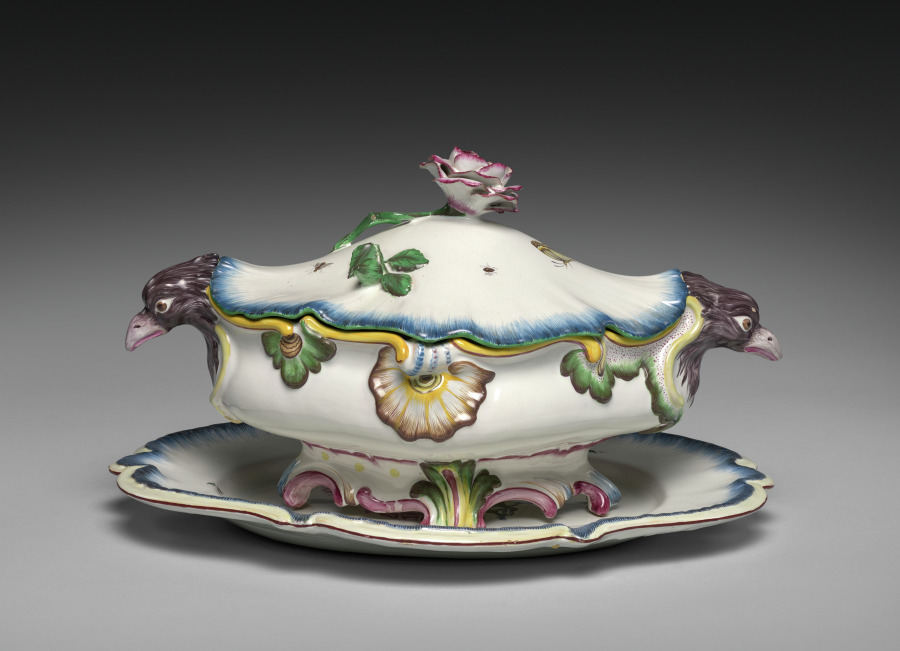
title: Covered Tureen on Stand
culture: France, Strasbourg, 18th century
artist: Strasbourg Factory (France)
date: c. 1750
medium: tin-glazed earthenware (faience) with enamel decoration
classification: Ceramic